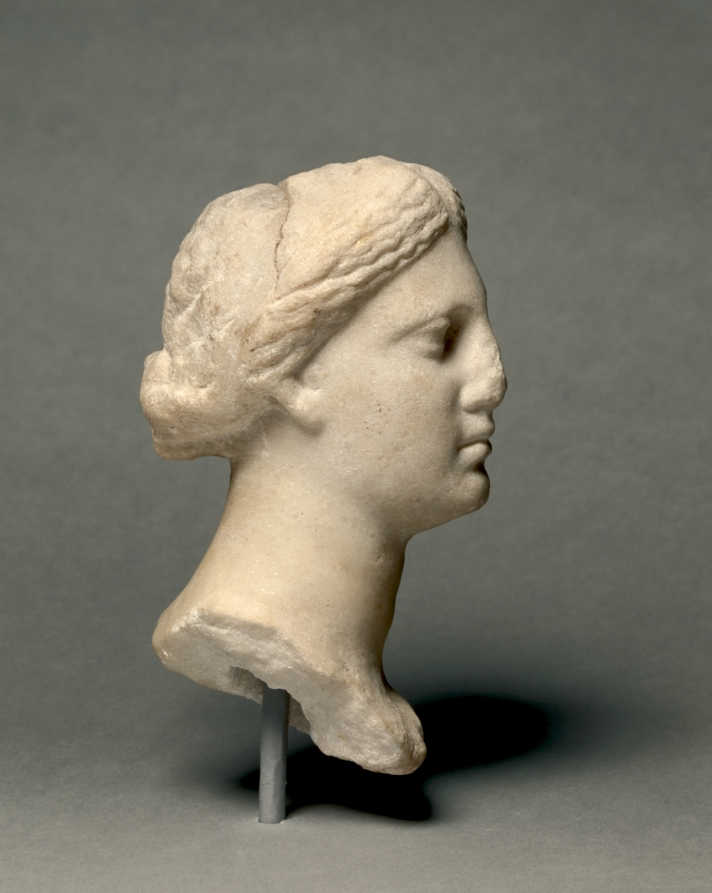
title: Head of a Woman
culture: Greece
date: 400–200 BCE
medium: marble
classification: Sculpture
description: This marble bust of a woman is rendered with the soft, delicate features typical of Greek sculpture of the late fourth and early third century BCE. Her features nearly disappear into the smooth landscape of her face, each curve fading softly into the next. Her hair is held away from her forehead in a series of tight braids pulled back to a bun, now mostly lost.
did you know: Though this hairstyle is often associated with sculptures of Aphrodite, it was also a popular style among mortal Greek women.